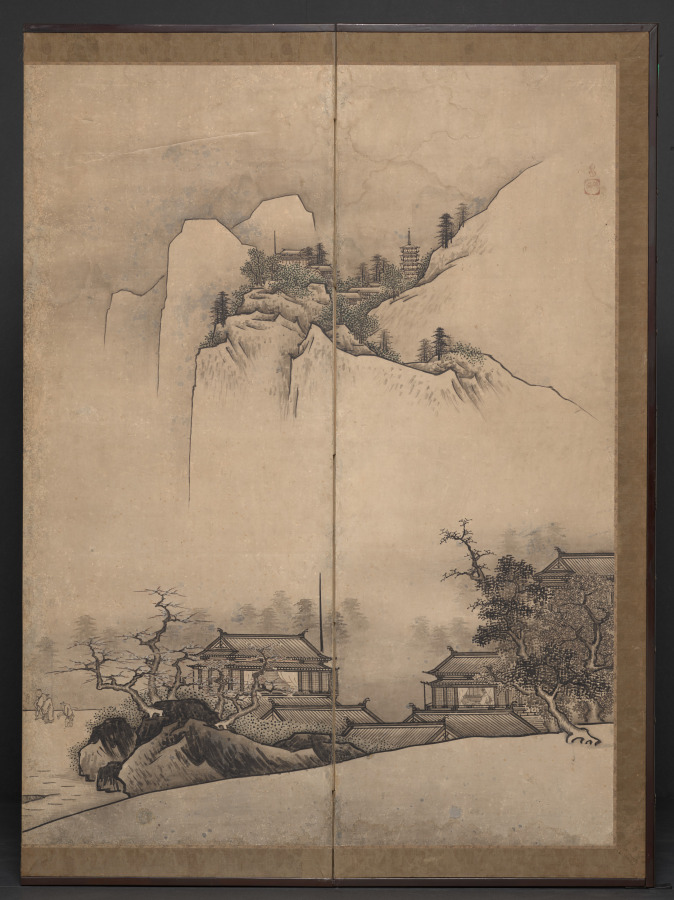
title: Chinese Pavilions in a Landscape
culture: Japan, Edo period (1615–1868)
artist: Unkoku Tōeki (Japanese, 1591–1644?)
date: 1600s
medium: Six-panel folding screen, ink and light color on paper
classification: Painting